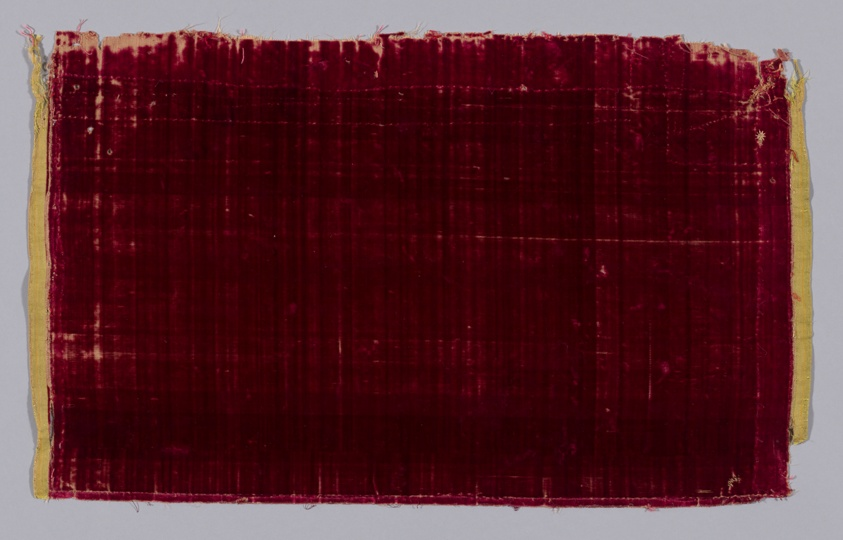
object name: Textile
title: Fragment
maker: Spain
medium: Silk, warp-float faced 3:1 broken warp chevron twill weave with supplementary pile warps forming cut solid velvet; reverse face inscribed with ink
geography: Spain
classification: textile; weaving - velvet